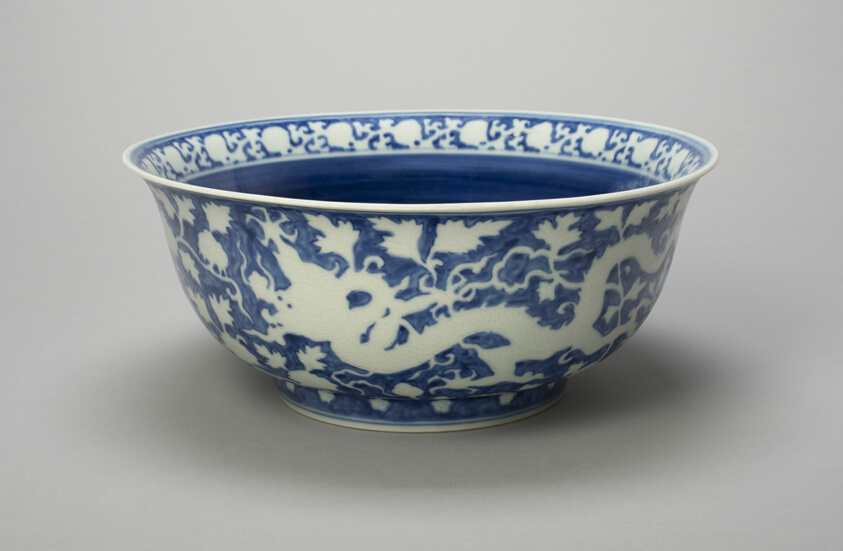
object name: Vessel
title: Bowl with Dragons, Peony Scrolls, and Band of Lingzhi Mushrooms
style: Chinese (culture or style)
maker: China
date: Ming dynasty (1368–1644), Jiajing reign mark and period (1522–1566)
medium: Porcelain painted in underglaze blue with design in reserve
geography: China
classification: bowl; porcelain; dish (vessel); asian art; ceramics; vessel